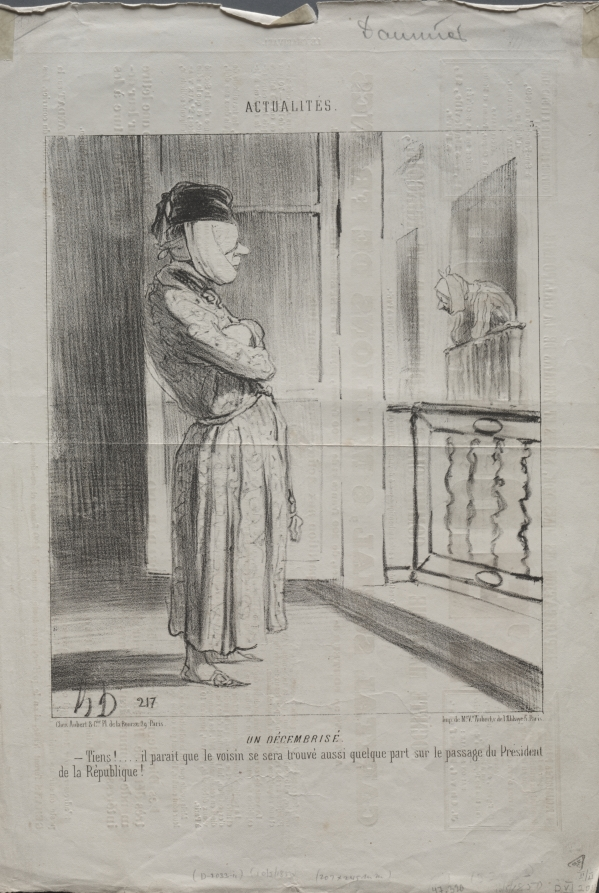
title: A Decemberist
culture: France, 19th century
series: News of the Day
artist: Honoré Daumier (French, 1808–1879)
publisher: Aubert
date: 1850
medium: lithograph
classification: Print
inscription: Upper margin, pencil: Daumier ; Lower margin, pencil: (D-2033-ii) (10/5/1850) (207 x 245 mm) / 47.320 10/5/1850 / II/II / Dvi 2033 ; Lower margin, printed: Chez. Aubert 8 Cie Pl. de la Bourse 29. Paris / Imp. de Me. Ve. Aubert, r. de l'Abbaye 5. Paris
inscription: Above image, printed: ACTUALITÉS. / 3 ; Below image, printed: UN DÉCEMBRISÉ. / - Tiens!.... il parait que le voisin se sera trouvé aussi quelque part sur le passage du Président de la République!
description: This print was published in Le Charivari (October 5, 1850) as plate 3 from the series News of the Day.